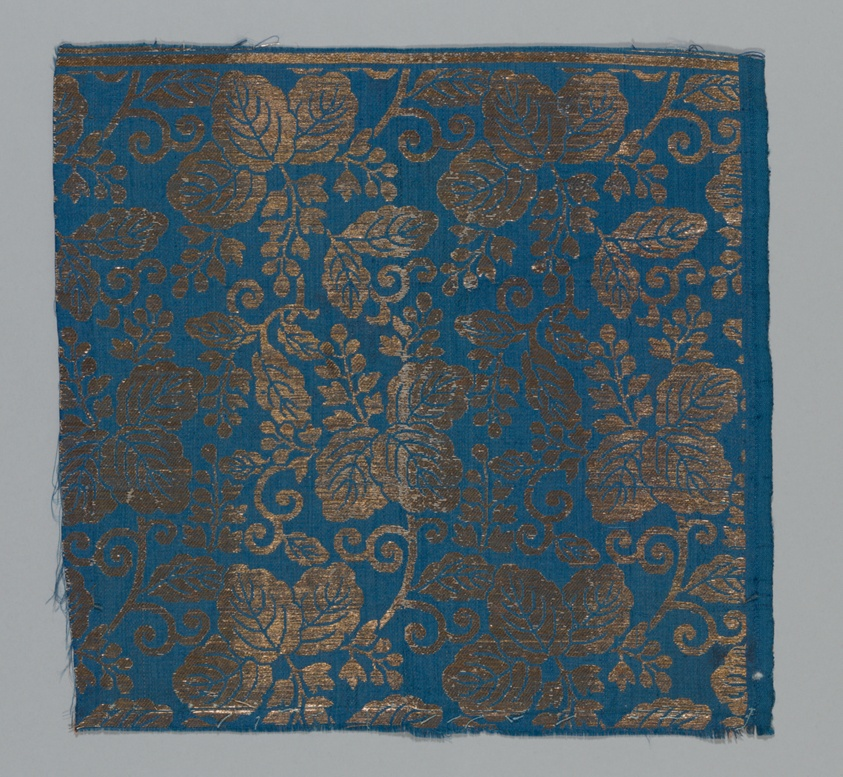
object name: Textile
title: Fragment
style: late edo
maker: Japan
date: late Edo period (1789–1868), 1800/25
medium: Plain compound twill, silk and gilt paper; 2 1/2 strips to m.m.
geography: Japan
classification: textile; weaving